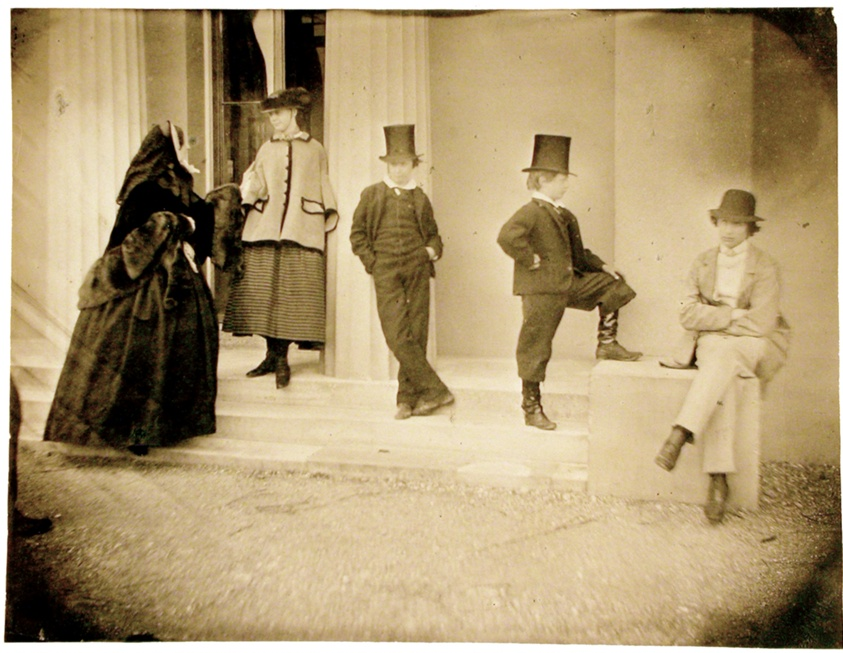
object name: Photograph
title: Untitled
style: 19th century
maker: Artist unknown; English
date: 1849/60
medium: Albumen print, from the "Untitled Album"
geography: England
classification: photograph; albumen silver print; photography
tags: Collected by Hugh Edwards